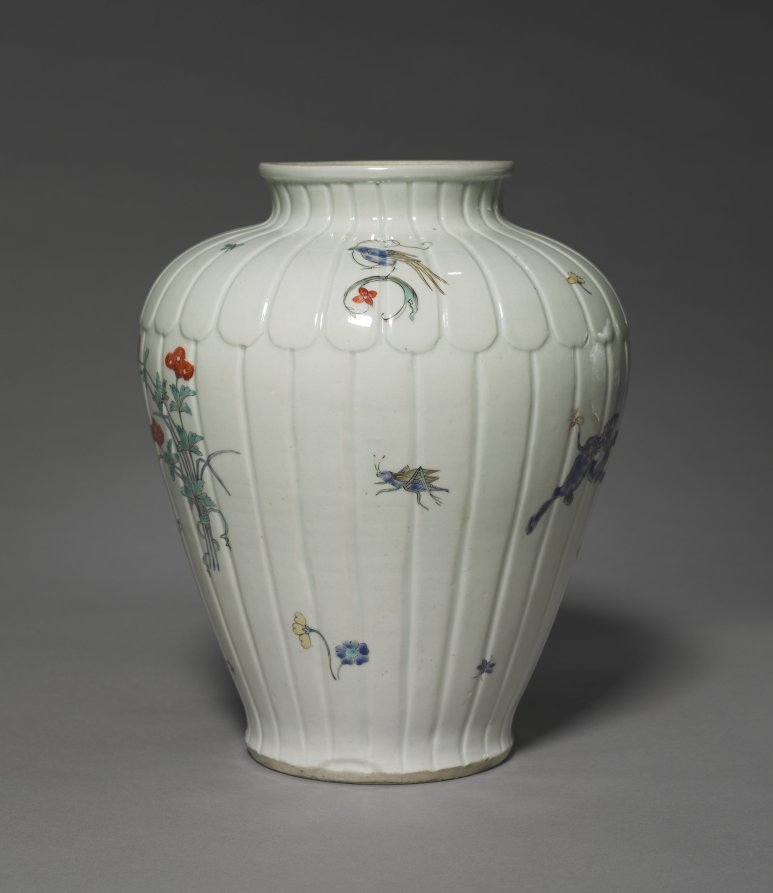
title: Vase with Floral, Insect, Bird, and Chinese Designs: Kakiemon Type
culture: Japan, Edo period (1615–1868)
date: late 1600s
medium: porcelain with overglaze enamel, gilding and carved decoration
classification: Ceramic